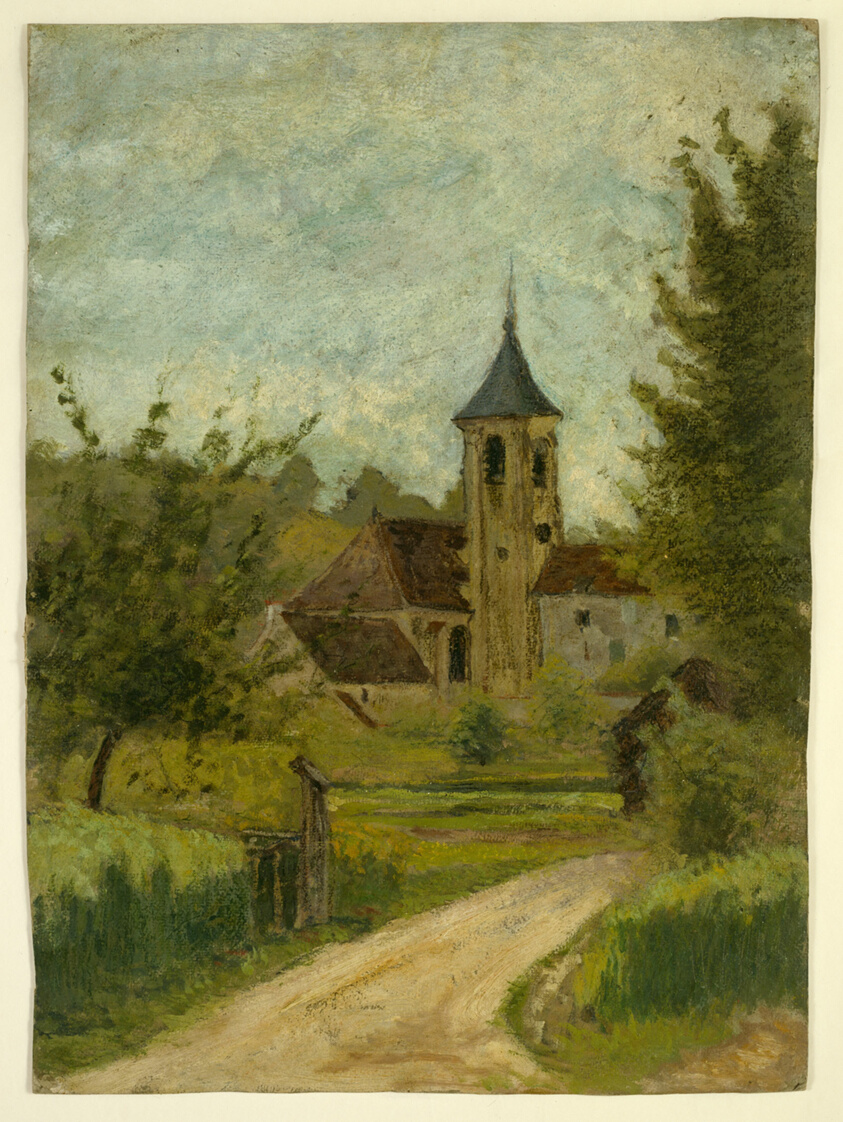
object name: Drawing and Watercolor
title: Mme Lili Grenier (recto); Landscape with Church (verso)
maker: Henri de Toulouse-Lautrec (French, 1864-1901)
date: 1885/88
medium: Oil paint, with graphite (recto), and oil paint with touches of black crayon varnished overall (verso), on gray cardboard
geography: France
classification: oil paintings (visual works); drawings (visual works); prints and drawing